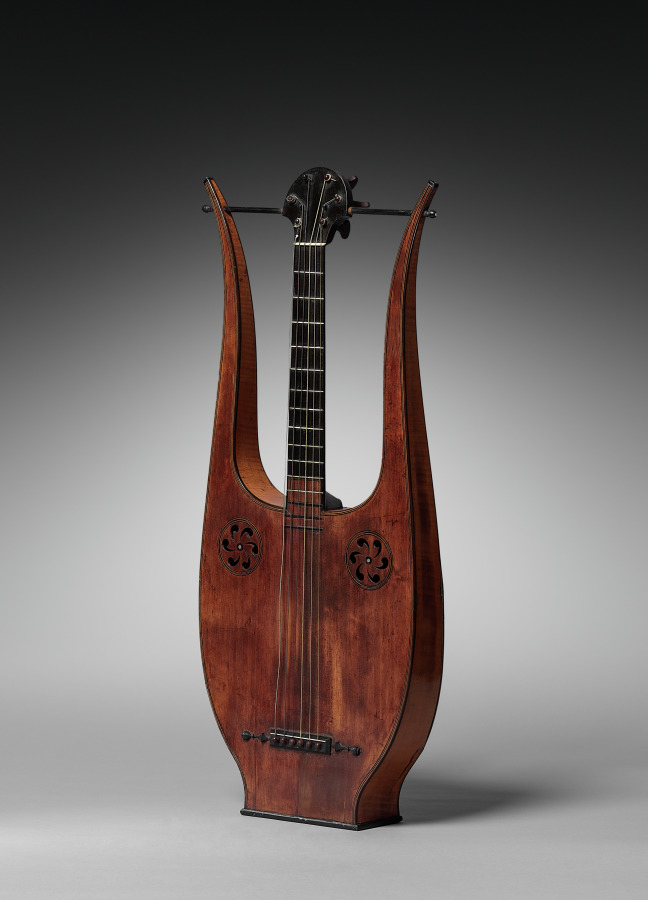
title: Lyre Guitar or Lirachitara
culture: France, 19th century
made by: M. C. Mousset (French)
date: c. 1800–1825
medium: varnished wood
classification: Musical Instrument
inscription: inscribed within sound box: "M. C. Mousset."